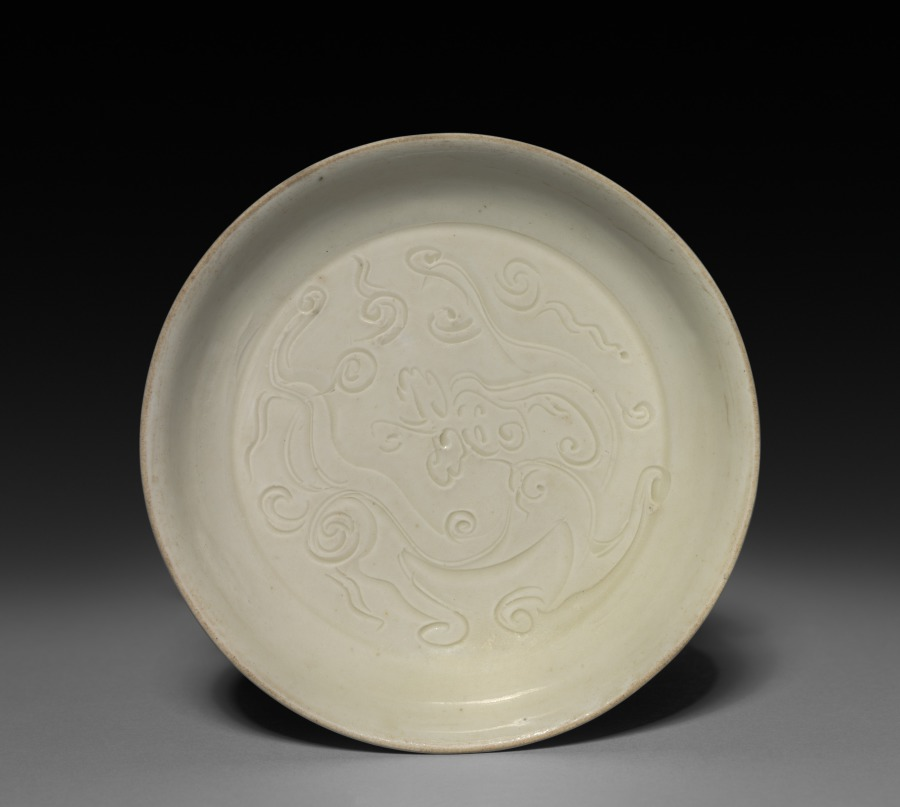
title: Dish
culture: China, Hebei province, Chuyang district, Jin dynasty (1115-1234)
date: 1100s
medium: White porcelain, Ding ware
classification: Ceramic